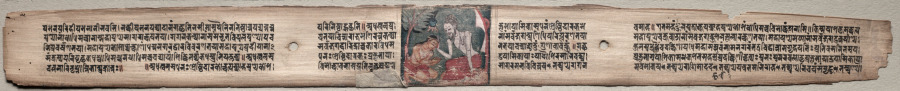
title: Sudhana and the rishi Bhishmottaranirgosha, folio 94 (recto) from a Gandavyuha-sutra (Scripture of the Supreme Array)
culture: Nepal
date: 1000–1100s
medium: gum tempera and ink on palm leaves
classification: Painting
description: The enlightened sage (rishi) places his hand on the pilgrim Sudhana's head and transmits his teachings through a trance-like vision. The name of his teaching is "Undefeated Banner," and the artist has painted an identifying banner behind him, at the right edge. This is one of the few paintings of this manuscript that explicitly relates to the text.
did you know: The sage has dreadlocks and wears a black antelope skin over his shoulder.